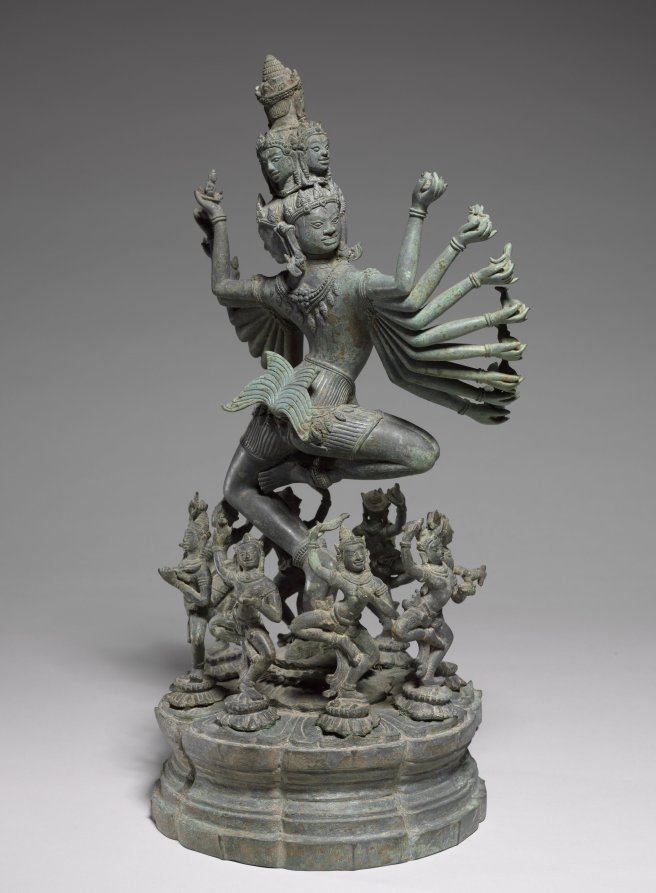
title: Hevajra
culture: Northeastern Thailand, former kingdom of Angkor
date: c. 1200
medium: Bronze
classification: Sculpture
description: Hevajra was an important figure signaling the practice of Buddhist rituals. King Jayavarman VII placed particular emphasis on Hevajra during consecration rituals and set up a colossal stone sculpture of dancing Hevajra at the east gate of his fortified city in the Khmer capital at Angkor. In the Cambodia of Jayavarman VII, tantric Buddhism became public and widespread, practiced together with other more mainstream forms of Buddhism, Hinduism, and ancestor worship. The iconography of Hevajra is described in detail in a text that bears his name, the Hevajra-tantra, first composed in India probably in the 800s. Hevajra has eight heads, sixteen arms, and four legs. His left hands hold images of Indic gods; wealth, death, sun, moon, fire, wind, water, and earth. In his right hands are animals: bull, lion, human, cat, camel, sheep, horse, and elephant. They all sit in skull cups, objects also used in tantric rituals. He dances on a corpse that embodies ignorance and is surrounded by eight yoginis who dance triumphantly in a ring around him. Yoginis functioned as intercessors between human practitioners and enlightened beings. Many bronze images of Hevajra were made during the reign of Jayavarman VII, but few survive in as pristine condition as this example. According to scientific analysis and curatorial reports, this sculpture survived in a clay vessel submerged in water, which accounts for its high tin content and unusual gray patina. Samples from the clay core reveal the presence of the mineral feldspar, a characteristic of clay from the Isaan plateau, on the other side of the mountain range not far from Banteay Chhmar, in present-day Thailand.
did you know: Hevajra, the Tantric Buddhist deity who personifies Enlightenment, dances vigorously to symbolize the human soul's liberation from the snare of existence.